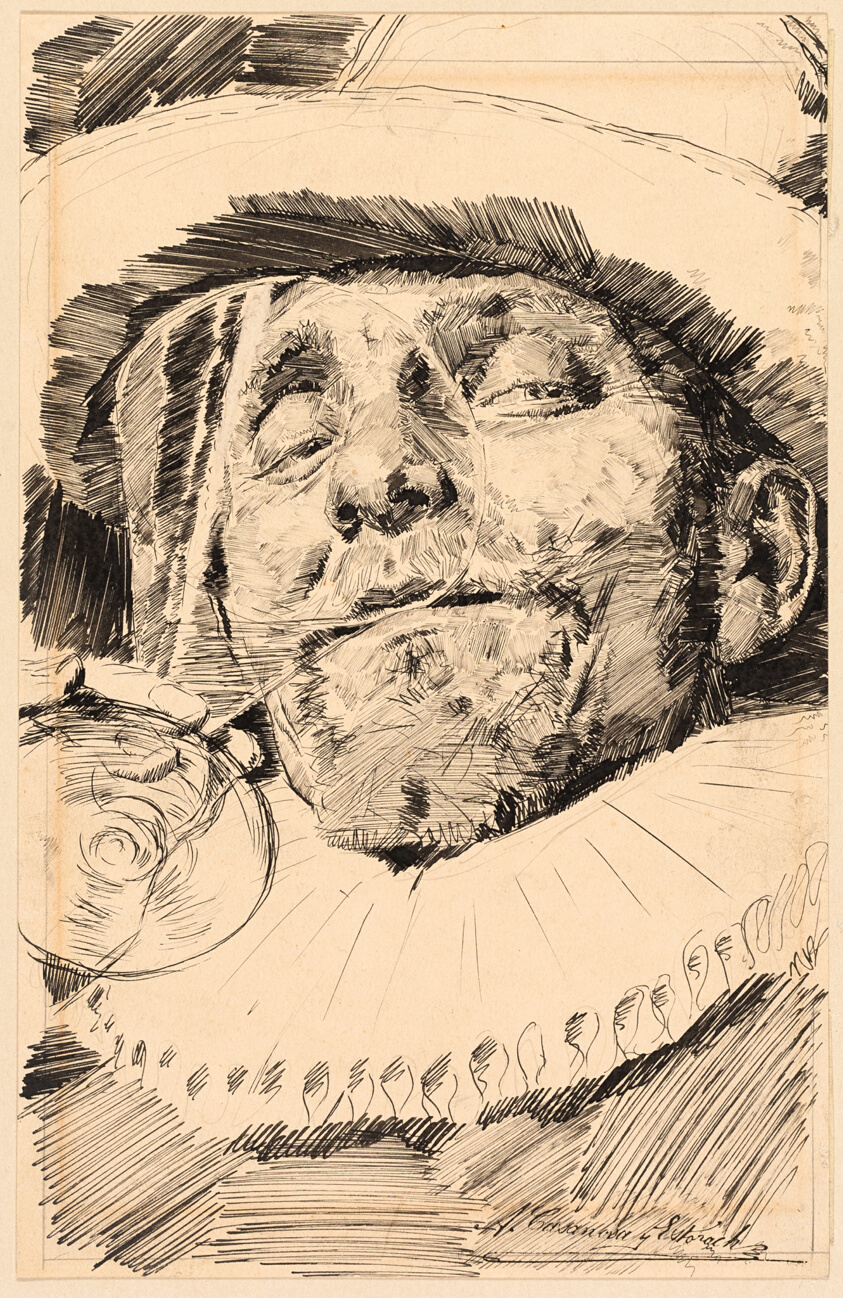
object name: Drawing and Watercolor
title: Cavalier Drinking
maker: Antonio Casanova y Estorach (Spanish, 1847-1896)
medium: Pen and black ink, over graphite, on cream wove paper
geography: Spain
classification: pen and ink drawings; drawings (visual works); prints and drawing